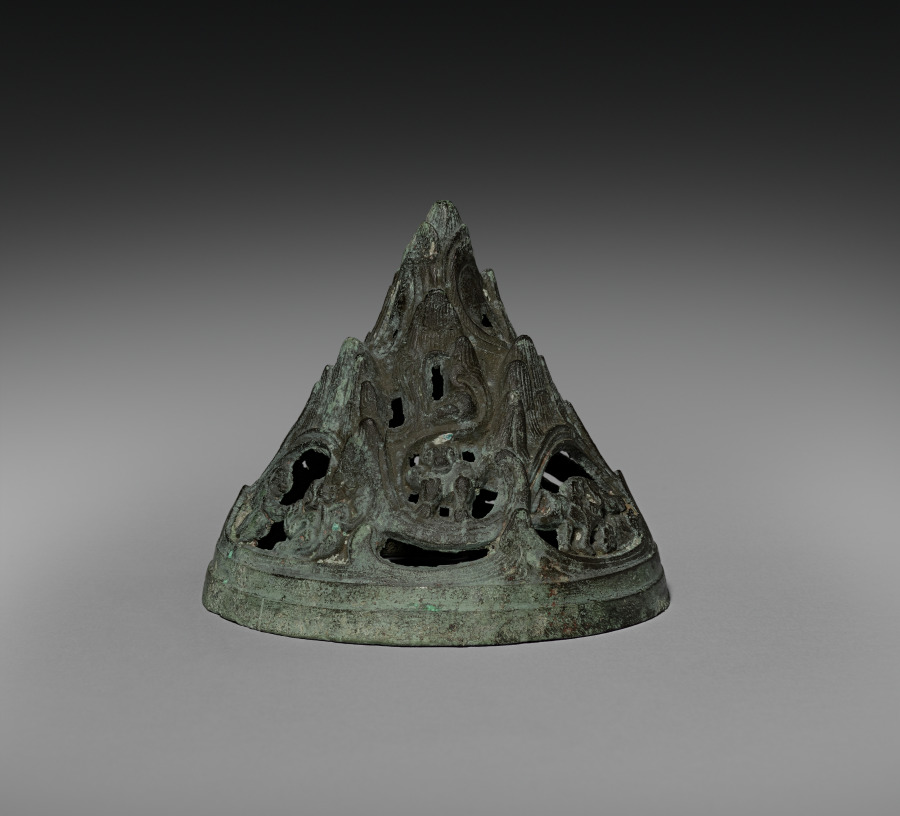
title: Incense Burner (Boshan Lu)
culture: China, Western Han dynasty (206 BCE–8 CE)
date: 200–100 BCE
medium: bronze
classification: Metalwork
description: The conical cover of this incense burner represents a miniature mountain with hunting scenes. The cover was shrouded in mist and emanated intoxicating smoke through its openwork when fragrant woods and herbs were burnt in its stem cup, transporting its beholder into an imaginative realm.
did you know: Deities (appearing as hunters) and fantastic beasts roam freely among mists and clouds on this incense burner.